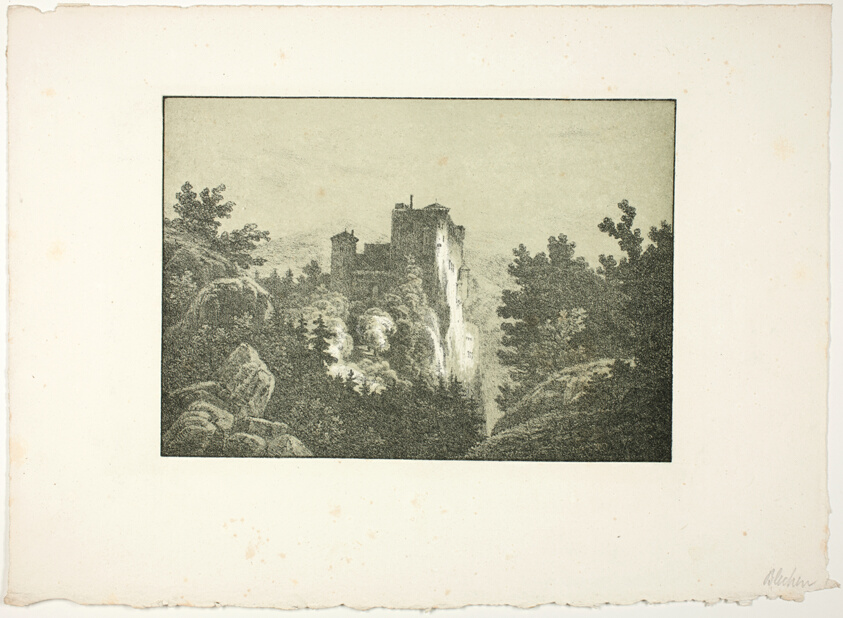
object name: Print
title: Ruins of a Castle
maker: Carl Blechen (German, 1798-1840)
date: 1825/27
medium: Lithograph with olive-green tint stone, heightened with white gouache, on ivory wove paper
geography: Germany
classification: lithograph; print; prints and drawing